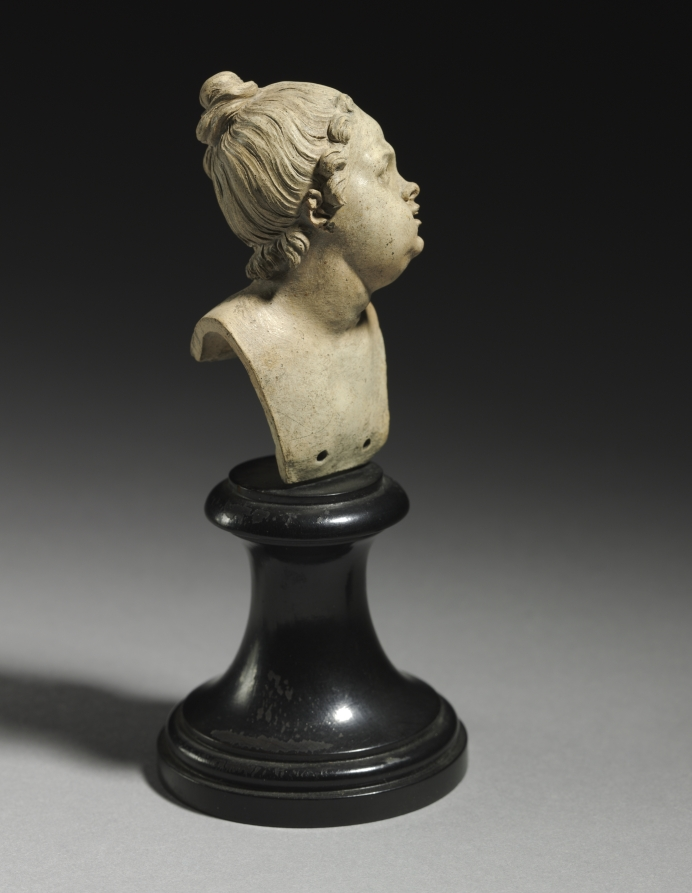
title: Head of a Woman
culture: Italy, Naples (?), early 19th Century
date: c. 1800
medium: terracotta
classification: Sculpture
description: Each of these miniscule terracotta busts has allegedly been formed by hand, though the precision of the detailed features implies that they have been cast from a mold. Details such as the meticulously executed facial features and the thin, exact rows of hair on each figure suggest a manufactured method of creation, yet the pair is deemed handmade. Furthermore, these figures lack any trace of fingerprints that handmade figures of this time typically bear. Small holes at the base of each bust suggest that the heads were once attached to bodies that may have been used as crèche figurines. The busts were created in Naples where large numbers of nativity scenes were produced around the turn of the nineteenth-century. The similarity in size to archetypal terracotta crèche figurines, as well as the vast production of nativities in Naples at this time lends to the possibility that these busts were created for a nativity scene.